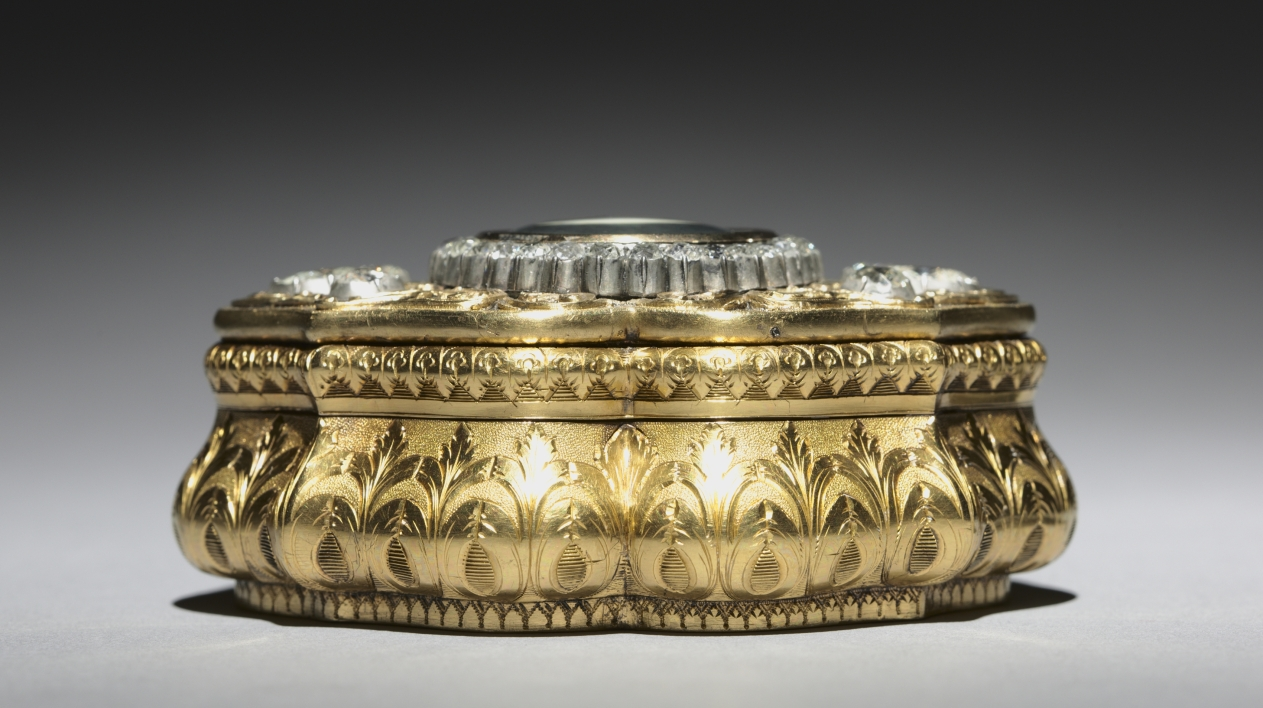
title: Box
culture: Switzerland, Neufchatel, 19th century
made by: Goffert (Russian)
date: c. 1850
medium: gold set with diamonds around a miniature of Tsar Alexander III (1845-1894)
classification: Miscellaneous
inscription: miniature signed in Russian: " " (Goffert).